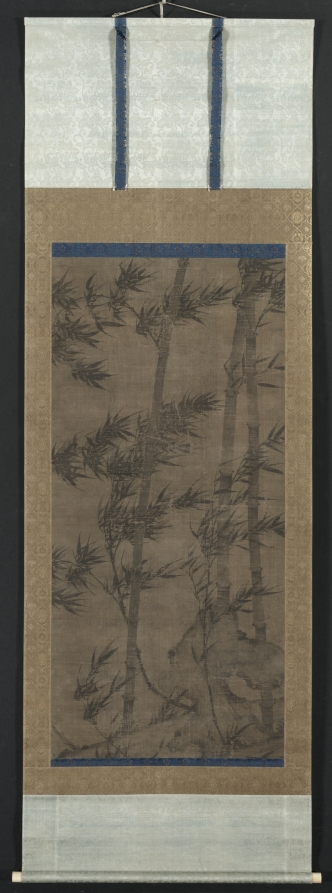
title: Bamboo in Four Seasons: Summer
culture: China, Yuan dynasty (1271-1368)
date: 1279–1368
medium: hanging scroll; ink on silk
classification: Painting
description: The painting depicts high bamboo stems in a breeze with leaves all torn in one direction. The rock on the right suggests a garden setting. Bamboo remains green throughout the year; new shoots emerge every spring and are a Chinese delicacy. During the Yuan dynasty, monochrome ink painting became the dominant style of the scholar-artist, and is used here by a professional painter. Monochrome bamboo with leaves blown in the wind was a popular subject as its depiction demanded brushstrokes and techniques similar to writing calligraphy.